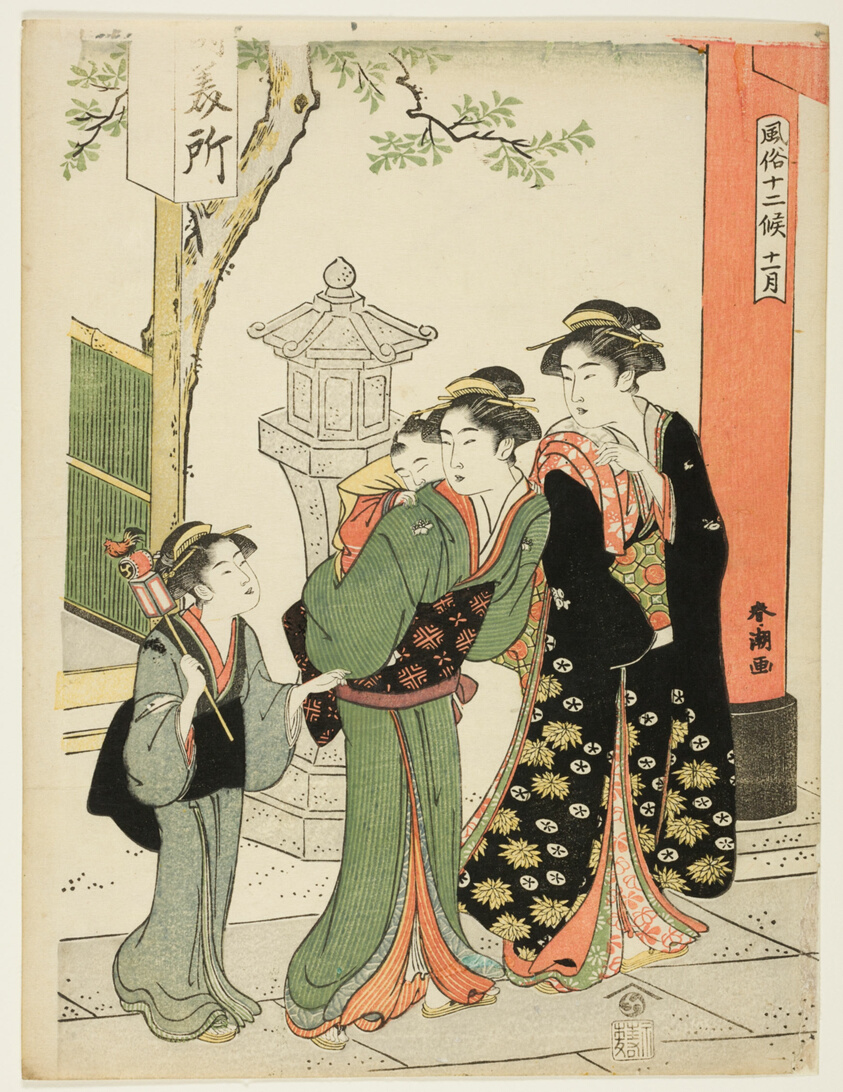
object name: Print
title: The Eleventh Month (Juichigatsu), from the series "Popular Customs of the Twelve Months (Fuzoku juni ko)"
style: Japanese (culture or style)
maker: Katsukawa Shuncho; Japanese, active c. 1780-1801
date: c. 1780/1801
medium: Color woodblock print; chuban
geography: Japan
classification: woodblock print; print; asian art